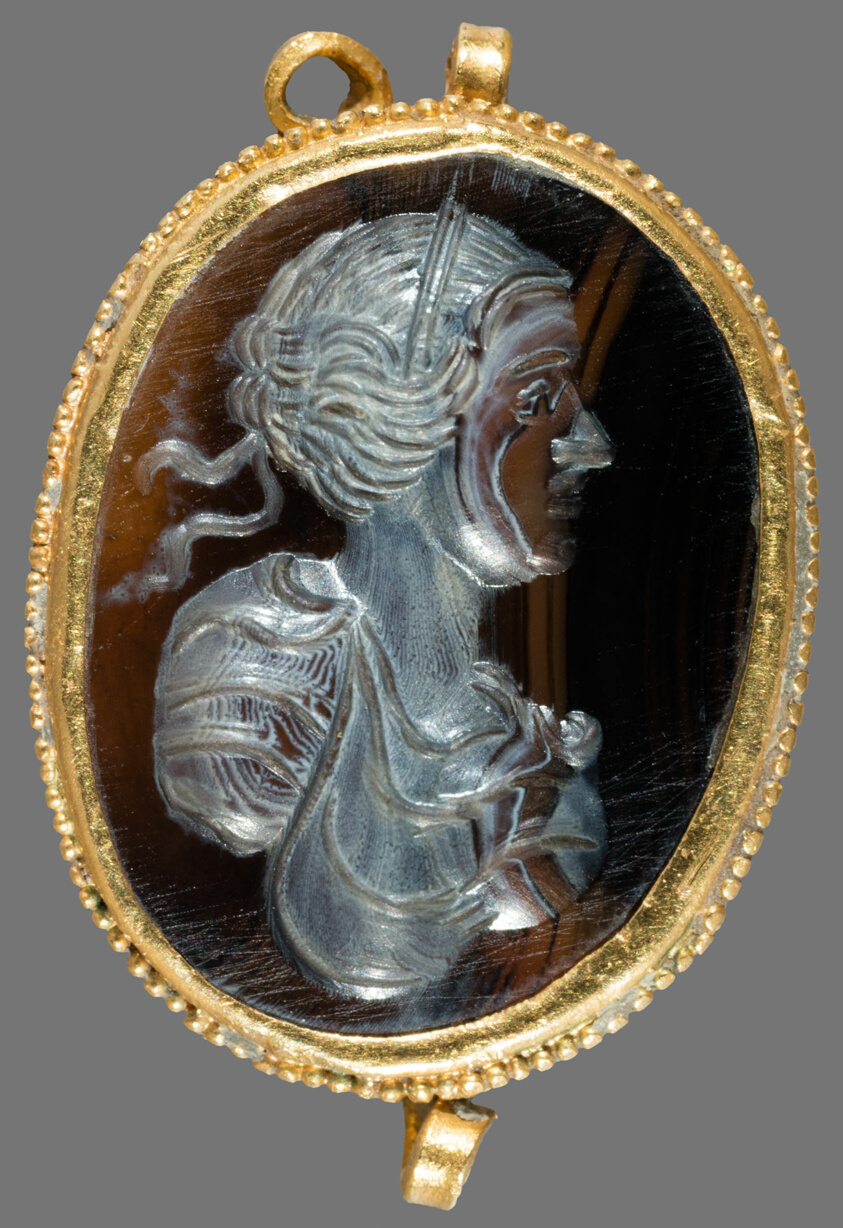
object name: Costume and Accessories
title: Pendant with an Intaglio of the Head of a Woman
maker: European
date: 16th century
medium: Gold and hardstone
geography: Europe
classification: pendant (jewelry); jewelry; european decorative arts; costume